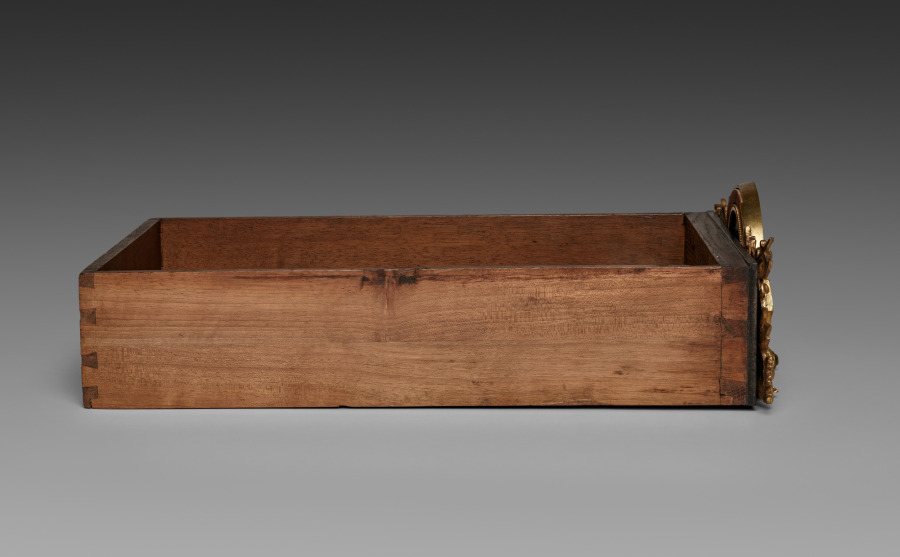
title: Center Drawer for Cabinet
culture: France, late 17th Century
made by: André-Charles Boulle (French, 1642–1732)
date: c. 1690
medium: ebony, marquetry in metal and tortoiseshell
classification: Furniture and woodwork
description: Appointed cabinetmaker to King Louis XIV in 1672, André-Charles Boulle became a master of furniture making in France during the late 1600s until his death in 1732. Known primarily for his use of marquetry, in which metal patterns are inlaid into tortoiseshell then applied within the veneered surface of the furniture, Boulle established a level of quality and craftsmanship few others could achieve. As a result, his work found favor at the royal court and among other aristocrats and diplomats eager to impress the king. The inclusion of a medallion depicting Louis XIV within the bronze decoration of this chest would have identified the owner with the royal court. Often exhibiting stout architectural proportions with elegant groups of inlaid motifs such as the parrot on the central panel of this chest, Boulle’s designs are an example of the intellectual fashion for contrasting ideas, materials, and motifs.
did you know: Originally designed to sit atop an elaborate tall stand, this chest was likely altered in the late 1700s to reduce its scale and height.